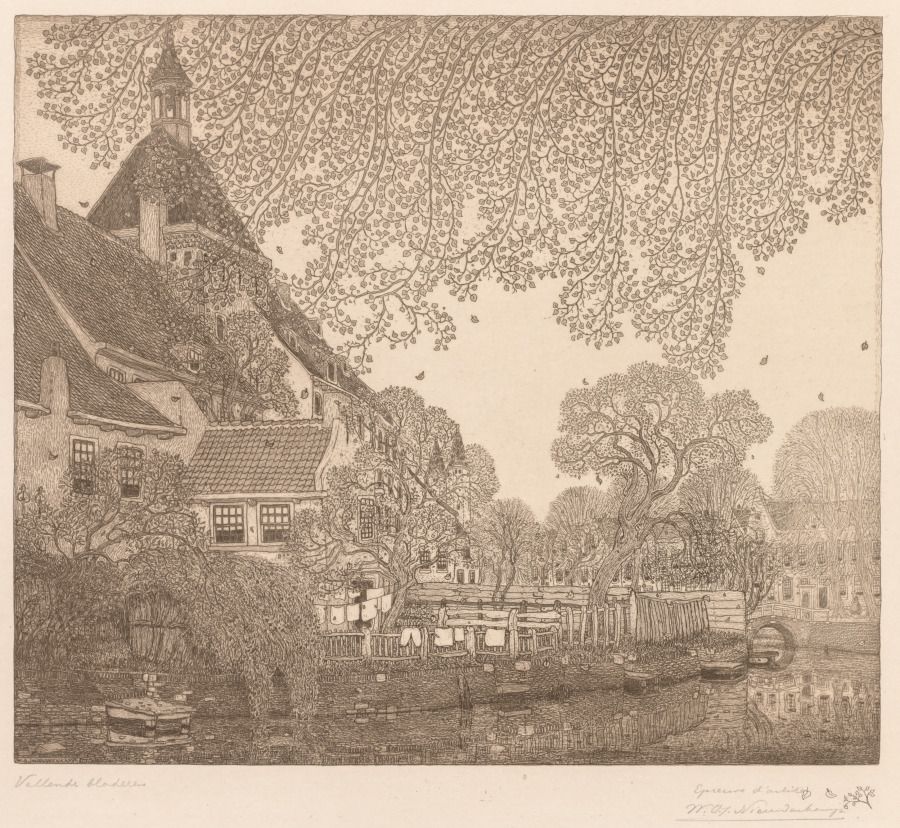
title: Falling Leaves, Amersfoort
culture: Netherlands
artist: Wynand Otto Jan Nieuwenkamp (Dutch, 1874–1950)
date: 1907–8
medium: etching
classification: Print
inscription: Lower left margin, in graphite: Vallende bladeren; lower right margin, in graphite: Épreuve d'artiste / W.O.J. Nieuwenkamp To the right of signature is an etching of a branch with leaves, and two falling leaves In plate, lower left: W.O.J. Nieuwenkamp.